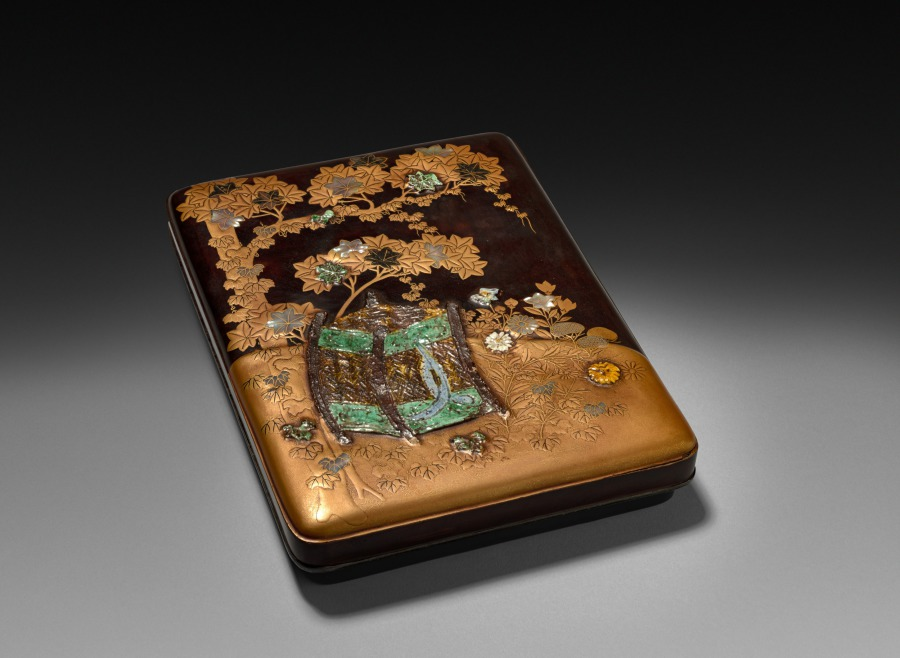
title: Inkstone Case and Lid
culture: Japan, Edo period (1615–1868)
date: 1800s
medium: lacquer on wood inlaid with mother-of-pearl, applied carved metal, and glazed ceramic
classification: Lacquer